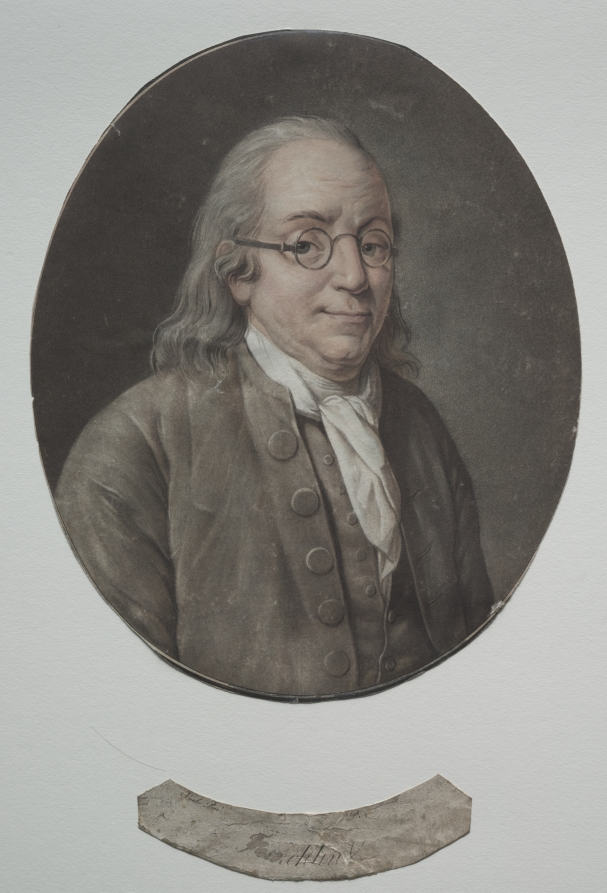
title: Benjamin Franklin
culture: France, 19th century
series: Collection des Grands Hommes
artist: Pierre-Michel Alix (French, 1762–1817)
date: c. 1795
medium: mezzotint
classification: Print